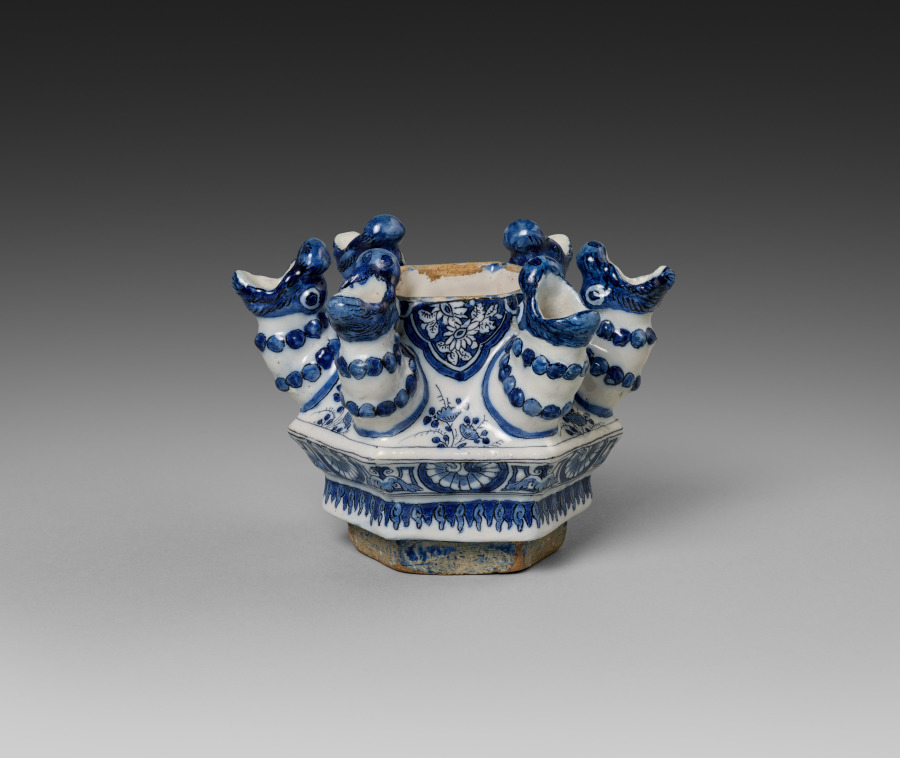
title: Fifth Tier for a Flower Pyramid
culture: Netherlands, Holland, Delft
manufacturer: Adrianus Kocx (Dutch, active 1686–1701)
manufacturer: De Grieksche A (The Greek A) Factory (Netherlands, 1658–1811)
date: c. 1690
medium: Tin-glazed earthenware, painted in blue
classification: Ceramic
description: Allegorical figures representing Faith, Hope, and Love decorate the base of this pyramid, on which rest six tiers with spouts where flowers can be placed. Flower pyramids are among the most complex and luxurious types of ceramics produced in Delft in the late 1600s. This example was made in the Greek A Factory, owned by Adrianus Kocx. During his tenure, the factory became the most prestigious of Delft potteries and received commissions from Queen Mary II, who ruled over England, Scotland, and Ireland together with her husband, William III. She contributed to the international spread of the fashion for Delft ceramics.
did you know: The iconic blue-and-white ceramics from Delft originated as an attempt to copy Chinese porcelain.